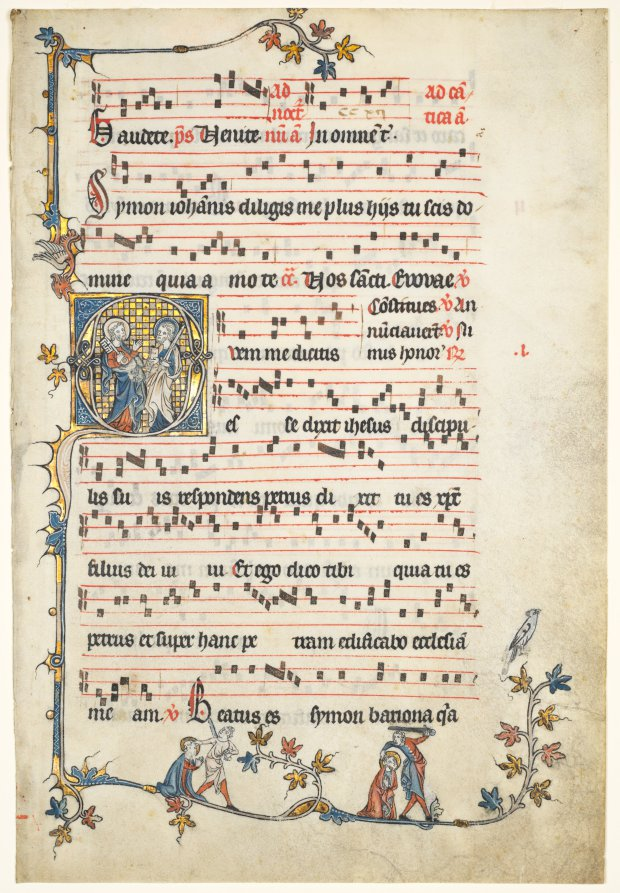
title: Leaf Excised from an Antiphonary: Initial Q with Saints Peter and Paul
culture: South Flanders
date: c. 1325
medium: ink, tempera and gold on vellum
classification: Manuscript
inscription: Quem me [esse] dicitis dixit Ihesus discipulis suis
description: The sheet belonged to an antiphonary, a large liturgical book used by the choir for chanting. It contains all the music and texts needed for daily services in the church. In South Flanders, where this manuscript originates, the Confrérie des Charitables de Saint-Éloi has been active since 1188, when a plague wave raged in the region. This brotherhood was in charge of giving bread to the poor, caring for the sick, consoling the dying, burying the dead, and giving them a burial.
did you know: This leaf comes from a manuscript once owned by the famous Victorian art critic John Ruskin (1819–1900), who removed some of its leaves to give away as gifts.